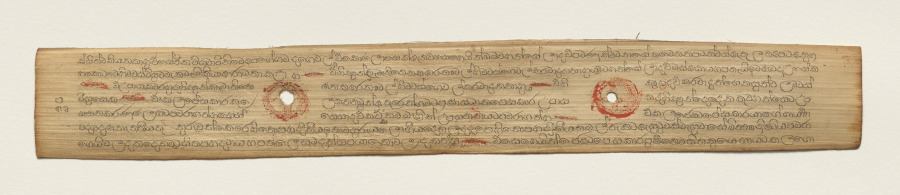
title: Leaf from a Buddhist Manuscript (recto)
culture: Sri Lanka, Singhalese, Late 17th century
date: c. 1700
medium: fiber paper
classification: Manuscript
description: Palm leaf material is still used for manuscripts in Sri Lanka. The palm leaves are prepared first by boiling them, drying them in the sun, and then rubbing them with oils. Scribes then use a metal stylus to incise the text. Then charcoal powder is wiped across the pages, filling in only the inscribed lines.